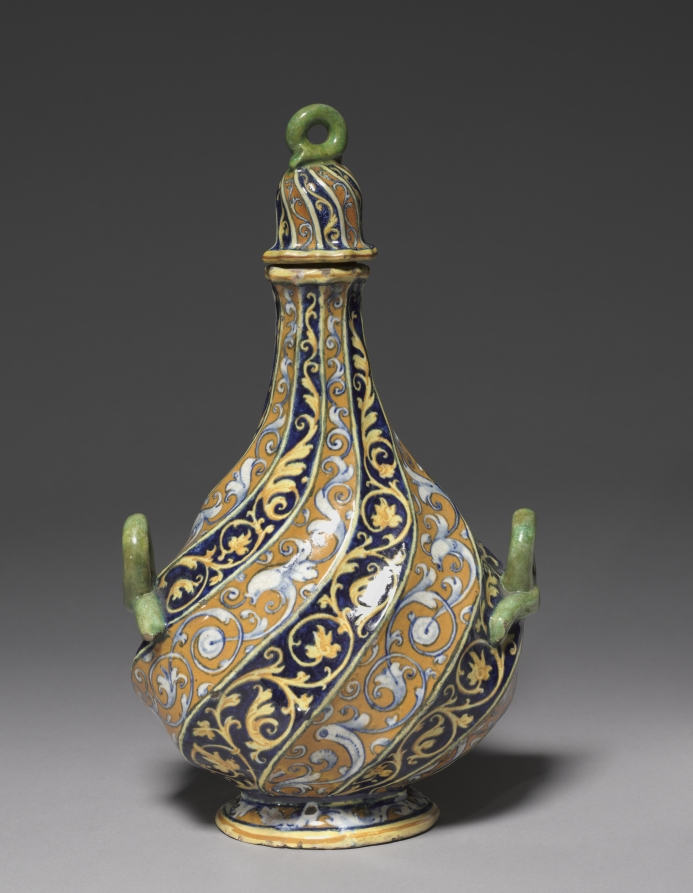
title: Pilgrim Bottle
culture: Italy, Papal States, Faenza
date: c. 1540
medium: tin-glazed earthenware (maiolica)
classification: Ceramic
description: During the Italian Renaissance of the 1400s and 1500s, nobles and merchants eager to express their wealth and sophistication ordered ceramics for dining, display, and storage. Known as maiolica, because it resembled the brightly colored ceramics from the Mediterranean island of Majorca, these ceramic vessels were covered with a tin glaze that provided an opaque white surface on which colorful decoration could be painted.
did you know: This pear-shaped vessel recalls flasks that early travelers tied to the harnesses of their horses on long trips or pilgrimages to holy sites.